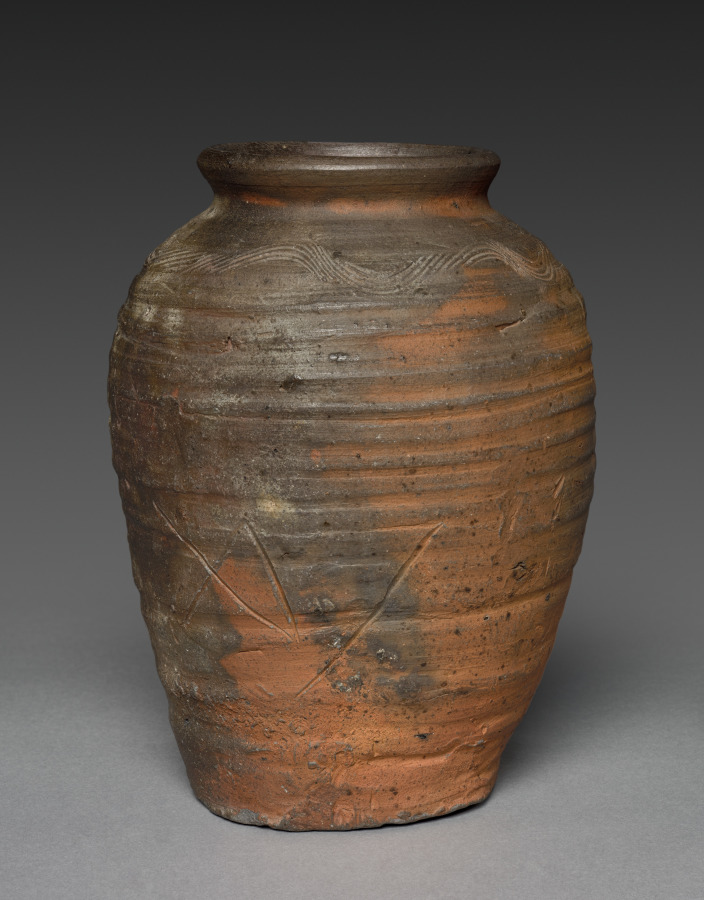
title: Storage Jar: Bizen Ware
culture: Japan, Muromachi period (1392–1573)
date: late 1400s-early 1500s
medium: stoneware with natural ash glaze, incised comb pattern, and incised potter's mark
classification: Ceramic